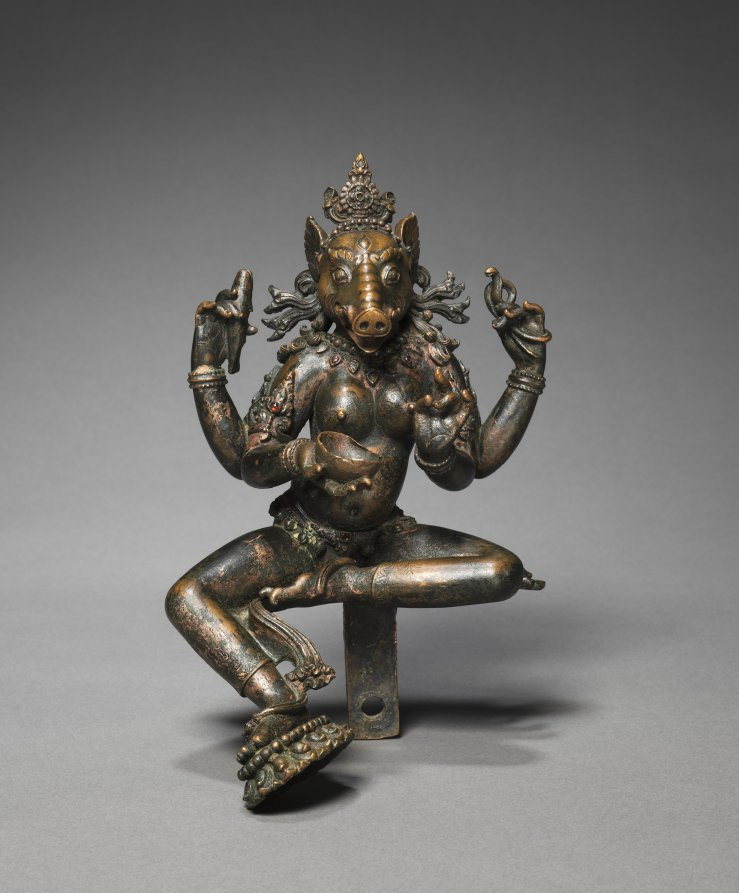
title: Varahi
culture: Nepal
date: c. 1300s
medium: bronze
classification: Sculpture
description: This Hindu goddess has the body of a young mother and the head of a female boar, which is the meaning of the Sanskrit word varahi, with the third eye of true knowledge. This sculpture was one of a set of seven goddesses associated with worship of the Hindu god Shiva or the mother goddess. The objects in three of her four hands reference the countercultural tantric Hindu practices of drinking revolting liquids from a bowl made from a skull. The fish implies the consumption of illicit food, and the snake pertains to the noose that keeps one bound in fear that leads to inevitable death. In tantric Hindu rituals, this goddess would aid the practitioners in overcoming their fears that keep them attached to ordinary life in the world, instead of reaching the liberated state of union with the creator.